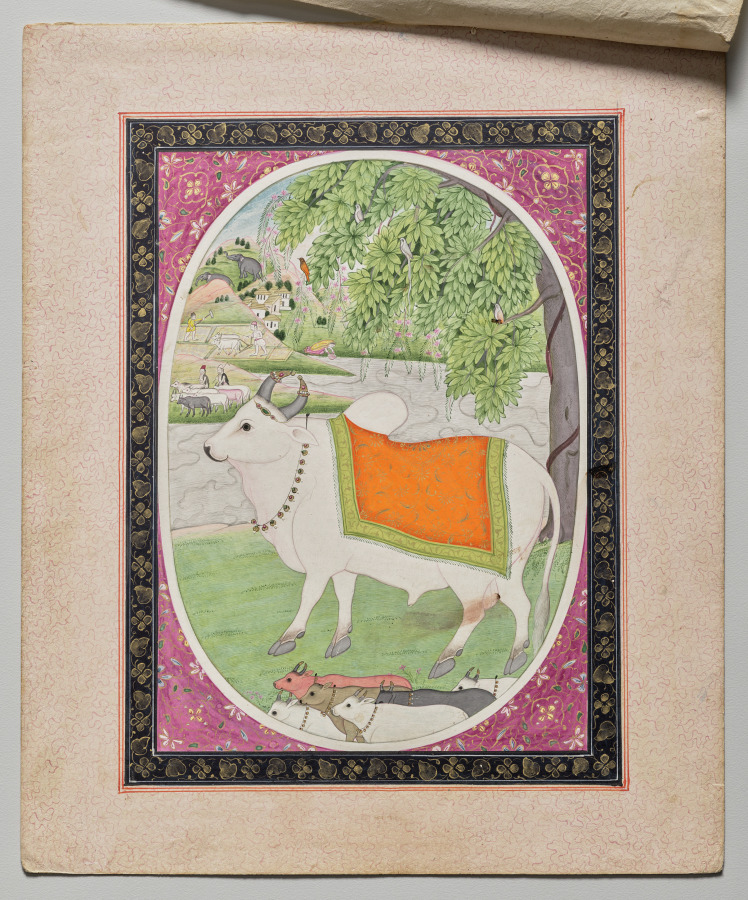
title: Taurus, from a "Mandi Astrology Series"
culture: Northern India, Pahari kingdoms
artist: attributed to Sanju (Indian, active late 1700s–early 1800s)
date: c. 1810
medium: Gum tempera and gold on paper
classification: Painting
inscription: The attached flysheet has a number, verse, and the stamp of the Mandi Royal Library, filled with the number 1296. The series number is 63, with the verse is number 2.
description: Standing for the astrological sign Taurus, the large-scale bull fills the space like a graceful icon behind a much smaller herd of cows. Pure white in color and in perfect profile, he has been adorned with a string of bells, a jeweled diadem, and decorative tips on his horns. A fine textile with gold leafy arabesque patterns sets him apart from oxen, dairy cows, and even the elephants in the distant background.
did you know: The oval format derives from the popularity of British cameos at the Mughal court.